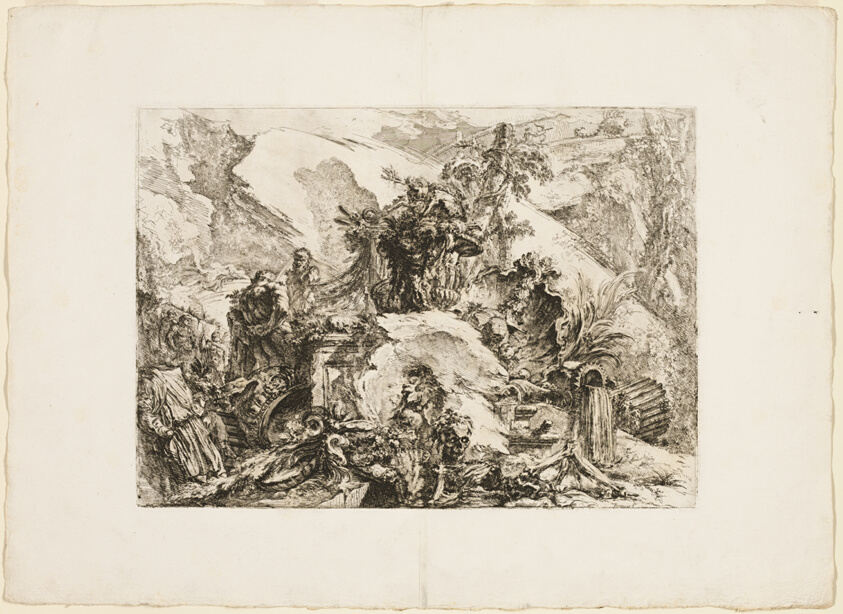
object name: Print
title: The Skeletons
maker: Giovanni Battista Piranesi (Italian, 1720-1778)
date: 1750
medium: Etching on heavy ivory laid paper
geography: Italy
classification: etching; print; prints and drawing